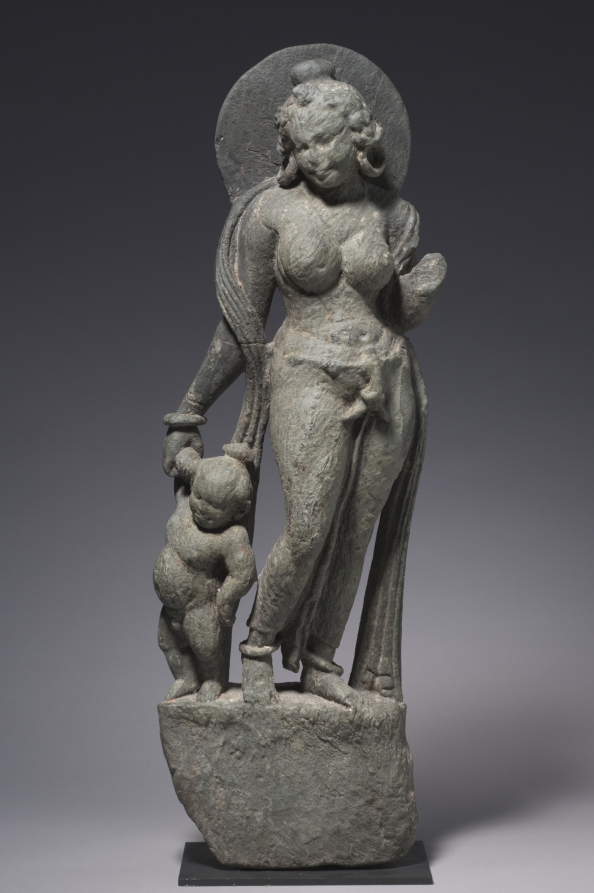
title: Mother Goddess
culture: Northwestern India, Rajasthan, Udaipur District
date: c. 600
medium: schist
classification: Sculpture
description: Sets of mother goddesses were installed in shrines near the entrance to Hindu temples. From one of the most naturalistic and charming sets, this mother attentively grasps the wrist of her toddler to gently guide him, while smiling lovingly and patiently at him. The simplicity of garments and ornament is characteristic of sculpture of the sixth century, and the naturalistic qualities of this work from northwestern India suggest connections with the Greco-Roman styles of Gandhara, in present-day Pakistan.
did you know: This sculpture was one of twelve that were brought to a modern temple known as the Tanesar (Thaneshvara) Mahadeva Temple.